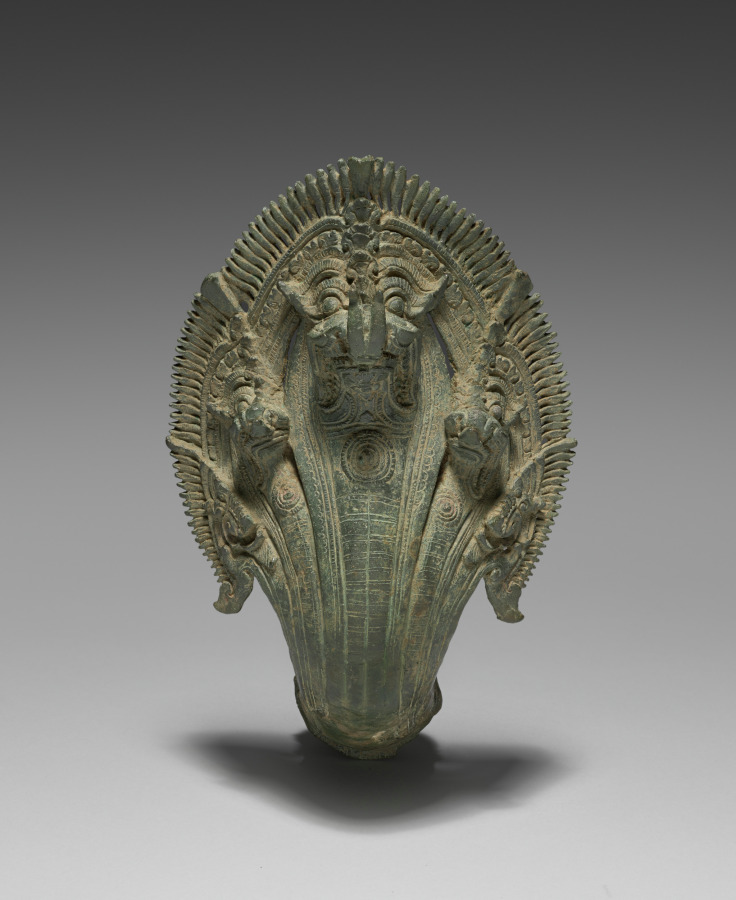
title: Naga Finial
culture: Cambodia, Angkor Wat Period, 12th century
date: 1100s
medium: bronze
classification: Metalwork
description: When members of the royal family or priesthood traveled in a public festival procession or to a temple to make offerings or participate in a ceremony, they would be carried in a palanquin, or a covered litter. Portable objects of veneration, such as bronze images or a sacred fire, were also carried on palanquins. The palanquins had wooden poles, hanging seats or raised platforms, and bronze fittings cast in intricate forms and gilt, lending the palanquins a sumptuous quality. The royal palanquins were typically fitted with multiheaded, serpent-shaped finials at the ends of the poles and corners of the elevated platforms. Naga means serpent in Sanskrit, a language from India selectively appropriated by the Khmer in Cambodia. In their own indigenous mythology, the Khmer people trace their descent from a naga princess and a prince from the island of Java who journeyed to Cambodia. The naga remains a potent emblem for the Khmer nation to this day; it is ubiquitous on Cambodian monuments.